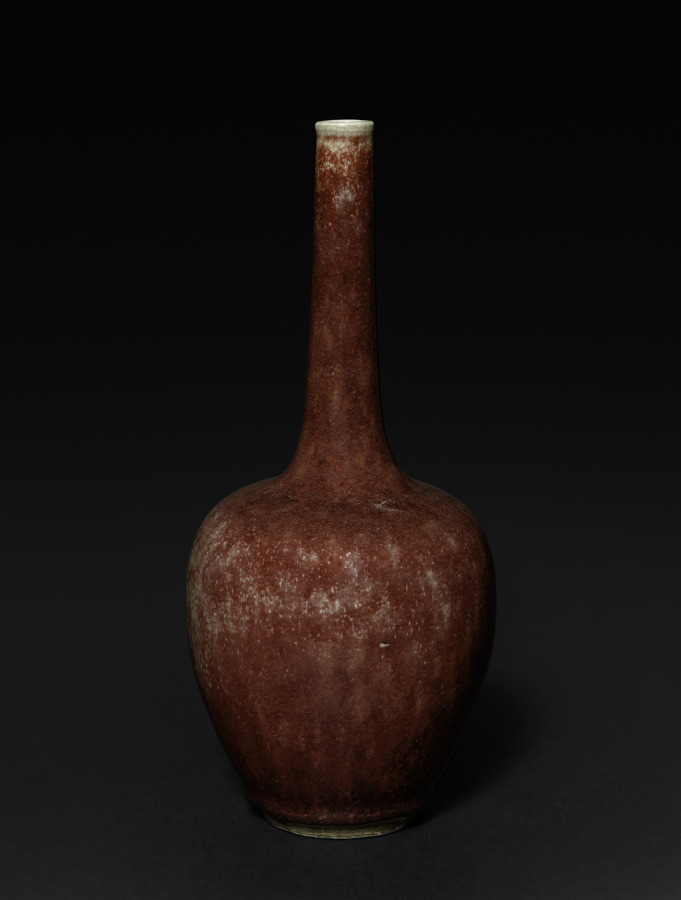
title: Bottle Vase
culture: China, Jingdezhen, Jiangxi province, Qing dynasty (1644–1911), Kangxi reign (1662–1722)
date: 1662–1722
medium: porcelain, Lang ware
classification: Ceramic